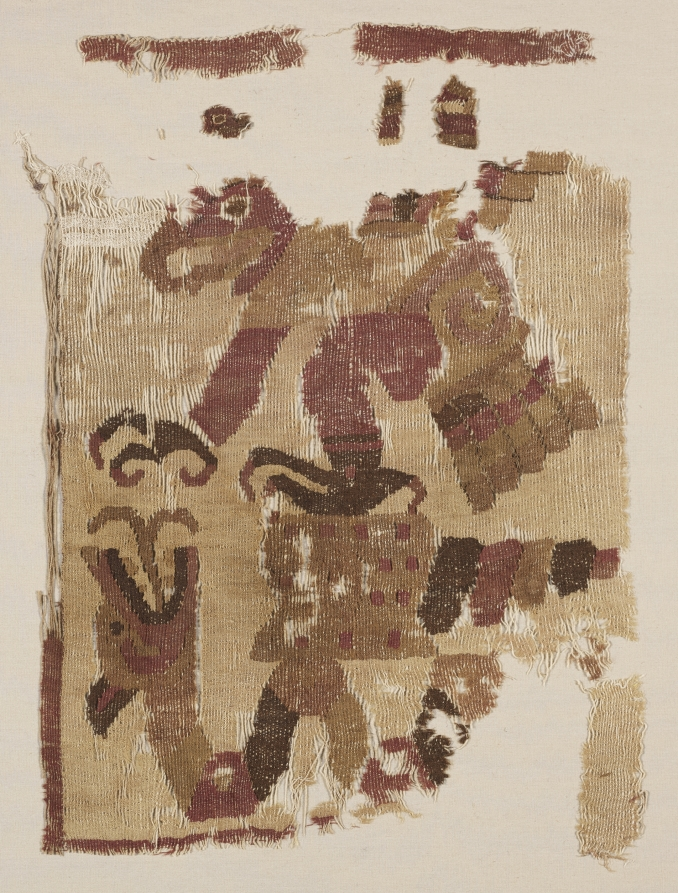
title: Textile Fragment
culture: Peru, Moche, north coast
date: c. 50–650 CE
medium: cotton and camelid fiber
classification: Textile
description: This fragment, one of several in the collection, is a rare survivor of catastrophic rains that destroyed much of the Moche textile legacy and may have helped to bring about the decline of Moche culture. It depicts a serpent and a snail beneath a hovering raptorial bird—perhaps a snail kite, a type of hawk named after its favored food. The size of the motifs implies that the original textile was large; a mantle (a shawl-like garment) or a hanging are among the possibilities.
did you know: This fragment is a rare survivor of floods that destroyed much of the Moche textile record.